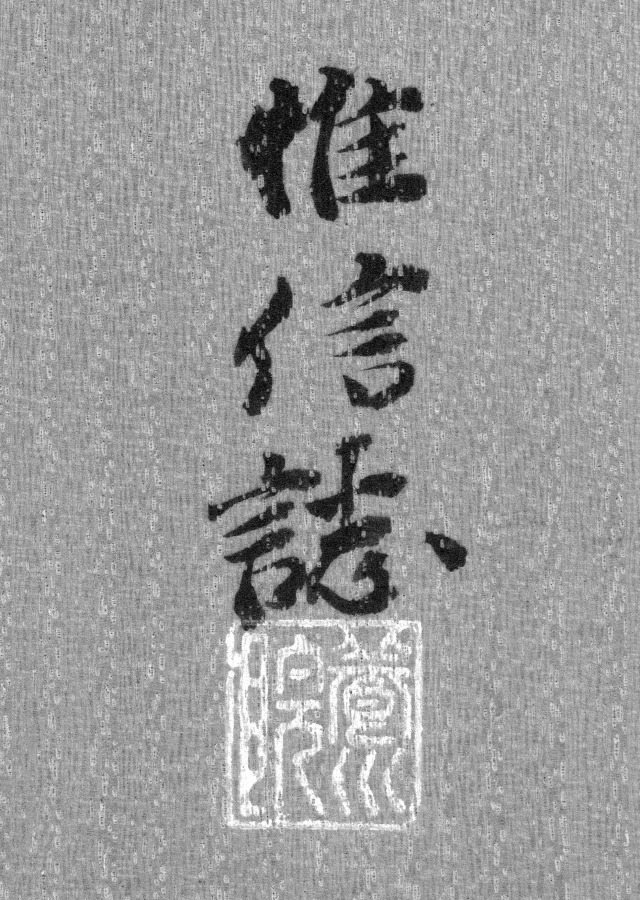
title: Windy Landscape with Sailboat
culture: Japan, Muromachi period (1392–1573)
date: mid-1400s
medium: hanging scroll; ink on paper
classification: Painting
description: Windy Landscape depicts the humble waterside retreat of an official retired from government service. For government officials, retreating from the city to a remote locale was the ideal retirement, though difficult to attain. In this scroll the retiree gazes out over the watery expanse past the sailboat to the mist-covered mountain in the far distance. The artist has achieved this depth of composition through carefully placed brushstrokes and ink washes.